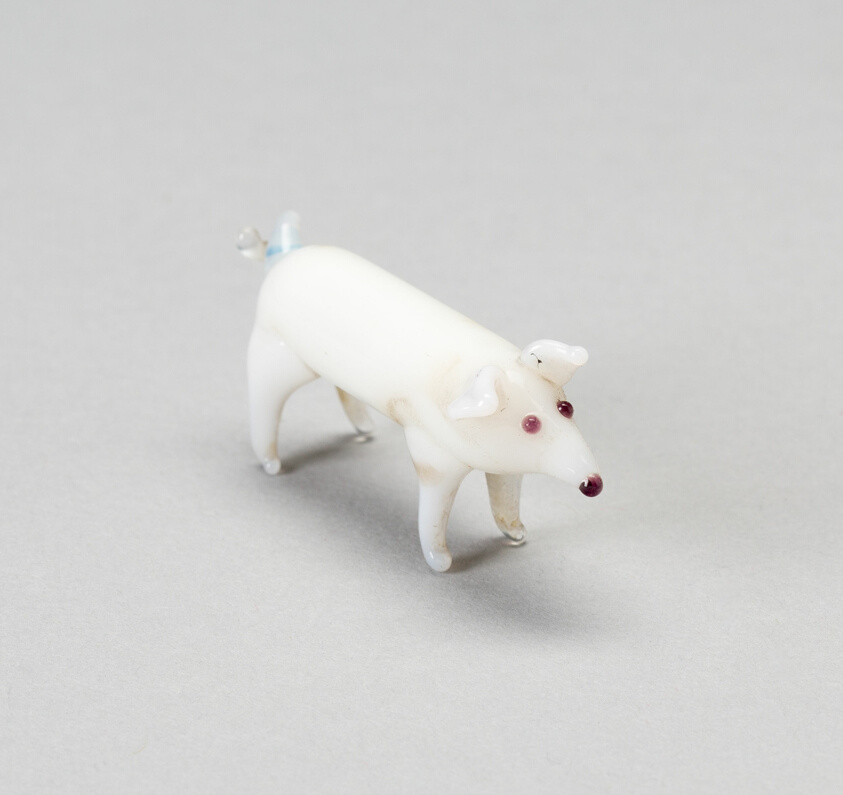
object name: Glass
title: Pig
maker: Nevers, France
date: 18th century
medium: Glass; lampwork (verre de Nevers), metal armature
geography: France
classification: decorative object/ornament; lampwork; glass; european decorative arts